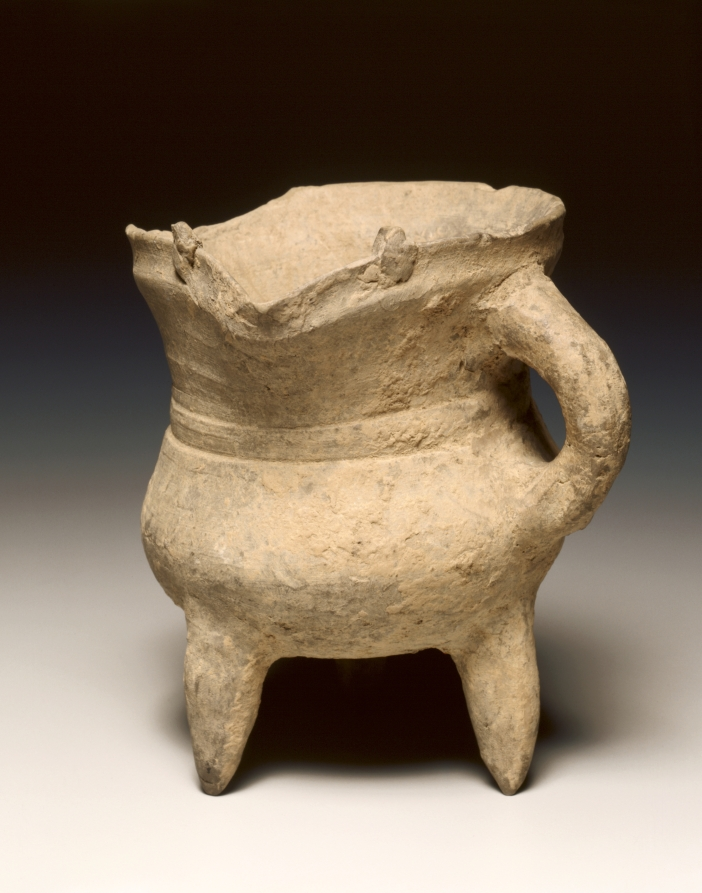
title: Wine Warmer (Jue)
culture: China, Shang dynasty (c. 1600–c. 1046 BCE), Anyang phase (c. 1250–1046 BCE)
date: c. 1300–1023 BCE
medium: pottery, tripod vessel with loop handle and rudimentary bowstring decoration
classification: Ceramic